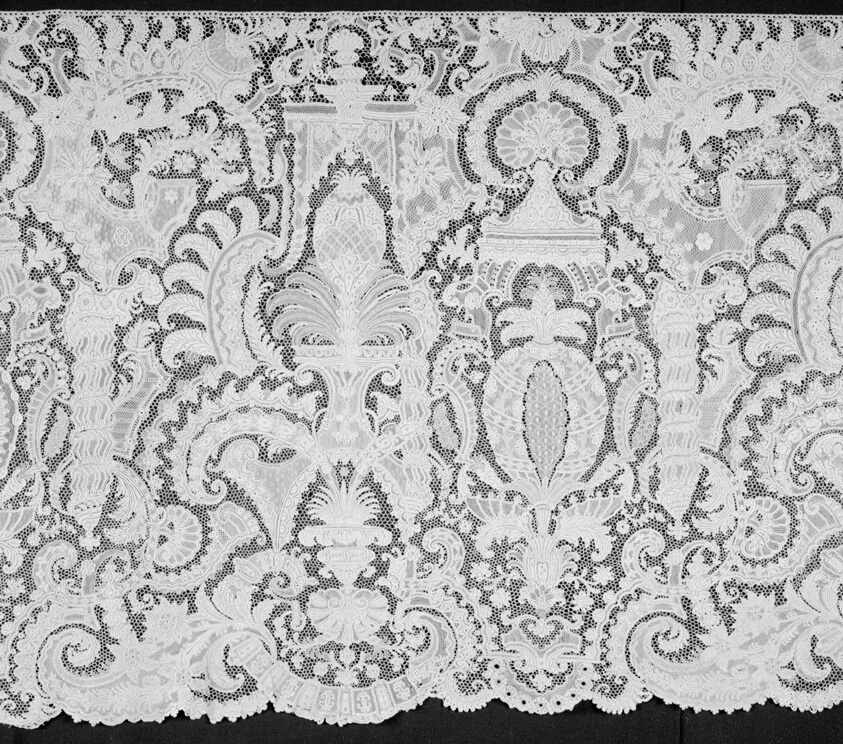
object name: Costume and Accessories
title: Flounce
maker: France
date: 1701/25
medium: Linen, needle lace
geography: France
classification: textile; lace - needle; costume component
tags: fashion, arabesque, cartouches, columns, pineapples